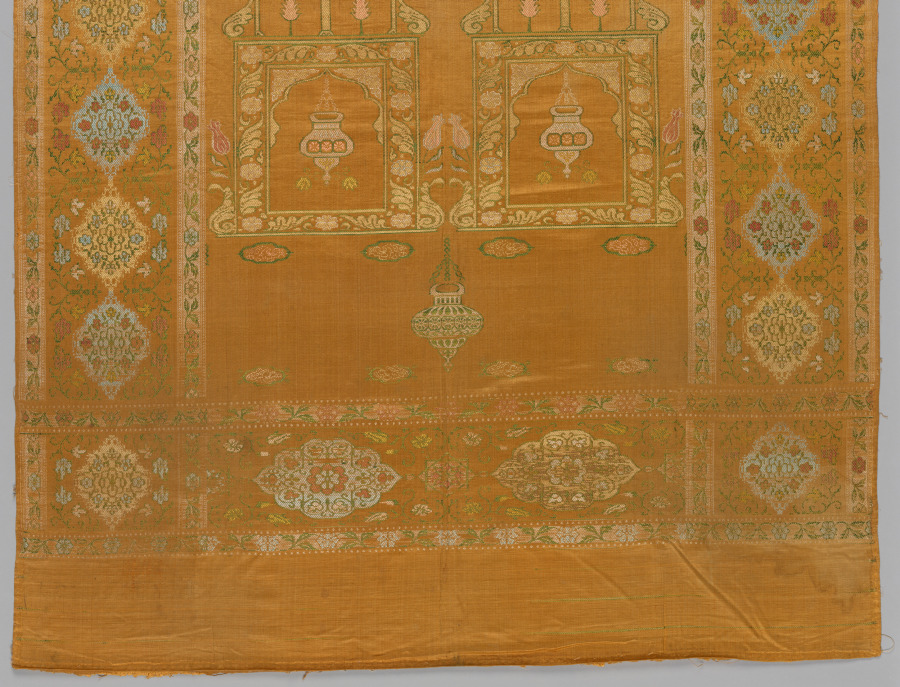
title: Coverlet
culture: Turkey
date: 1800s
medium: silk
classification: Textile